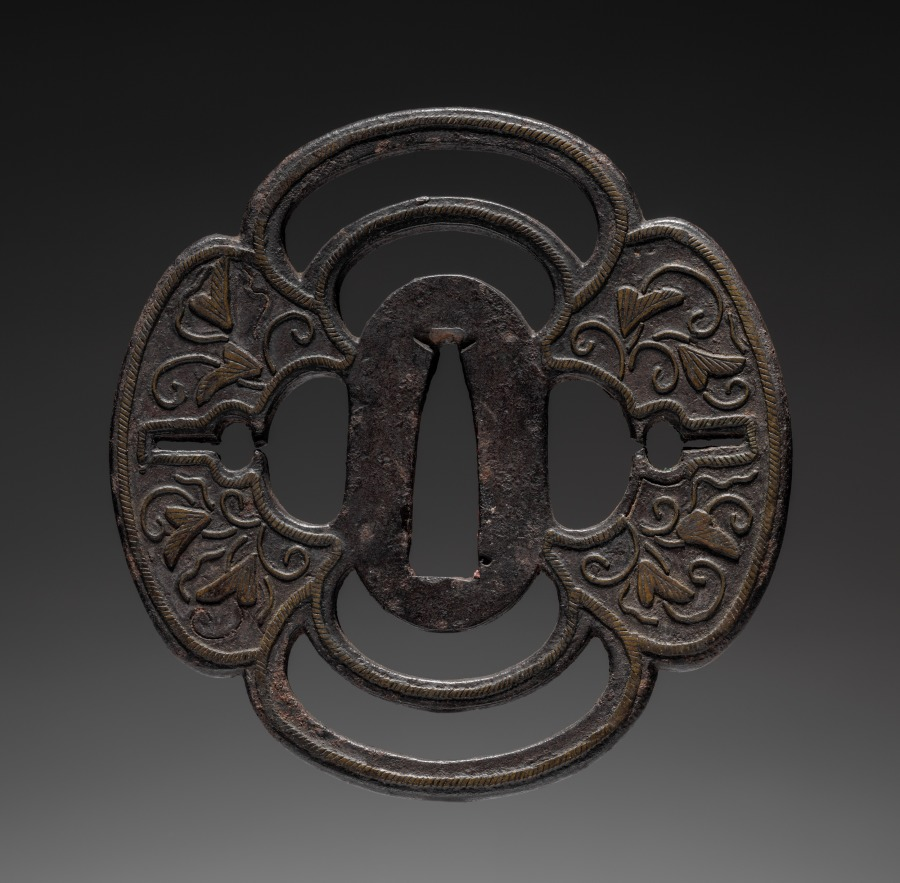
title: Sword Guard (Tsuba)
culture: Japan, possibly Edo period (1615-1868)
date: c. 1615–1868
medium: iron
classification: Arms and Armor